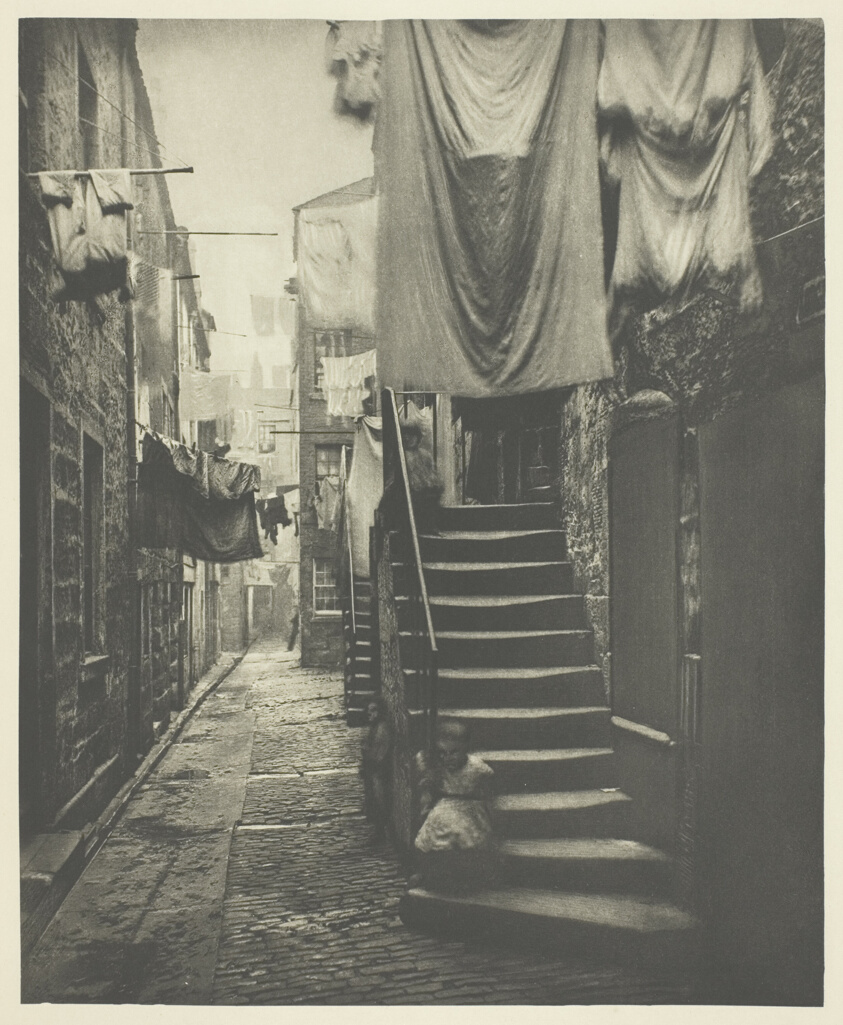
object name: Photograph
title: Close No. 193 High Street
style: 19th century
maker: Thomas Annan (Scottish, 1829–1887)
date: 1868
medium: Photogravure, plate 9 from the book "The Old Closes & Streets of Glasgow" (1900)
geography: Scotland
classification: photograph; photography